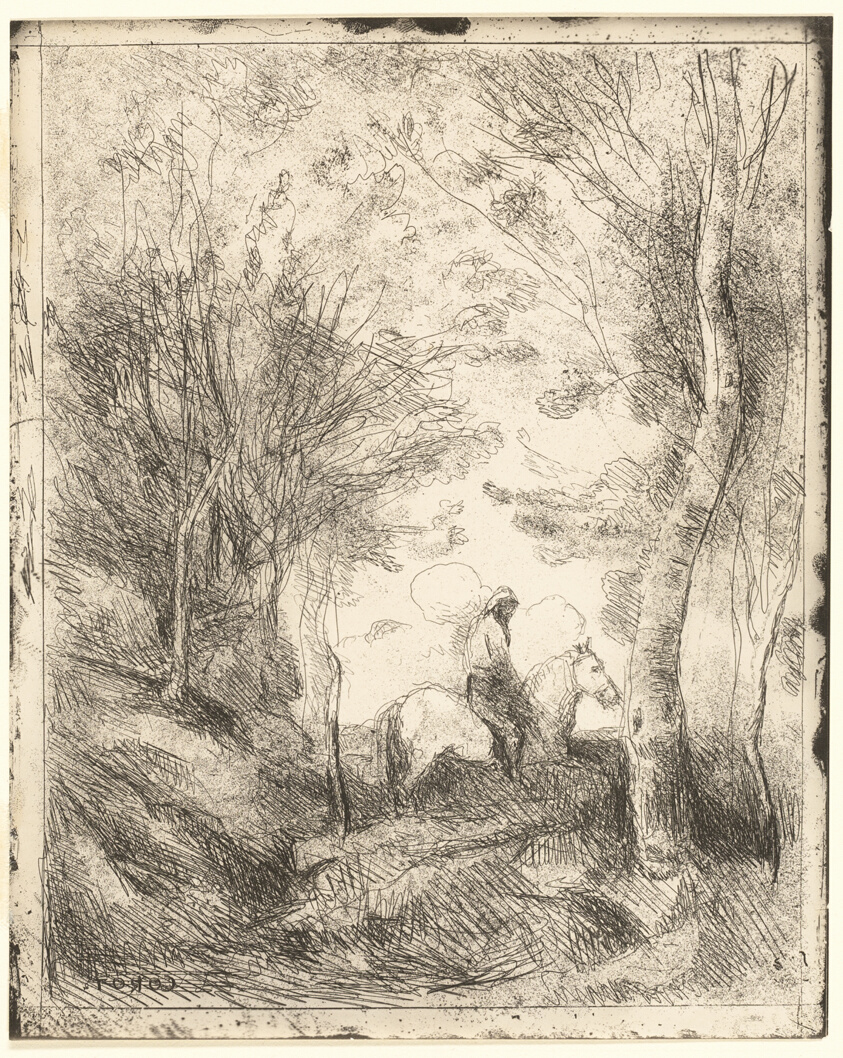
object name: Print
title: The Rider in the Woods, large plate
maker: Jean-Baptiste-Camille Corot; French, 1796-1875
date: c. 1854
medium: Cliché-verre on ivory photographic paper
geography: France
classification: cliché-verre; print; prints and drawing